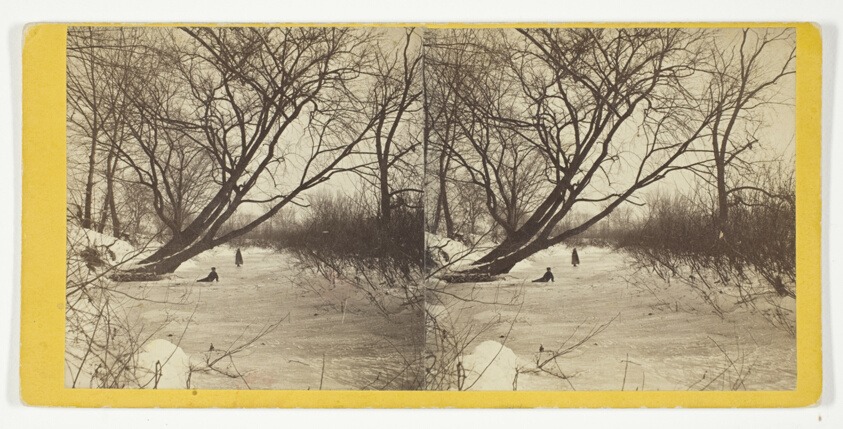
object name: Photograph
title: Winter Lane in the Country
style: 19th century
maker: Artist unknown; American, late 19th century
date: 1875/99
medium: Albumen print, stereo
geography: United States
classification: photography; photograph